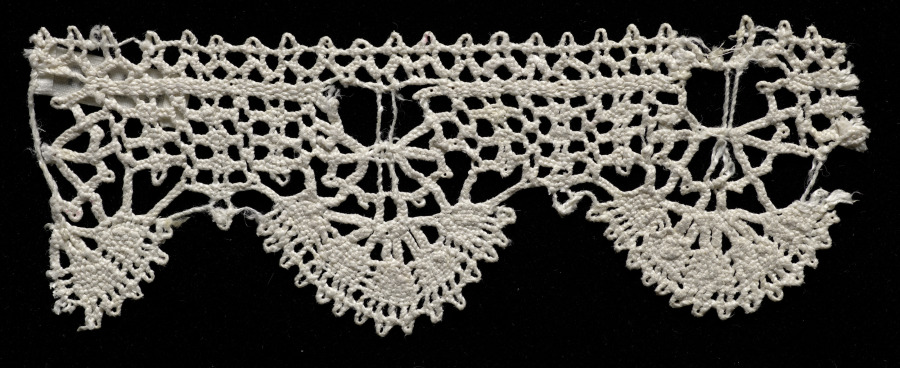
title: Lace Edging of Bell Points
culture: Italy, Genoa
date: 1600s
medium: Bobbin lace (rose lace)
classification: Lace